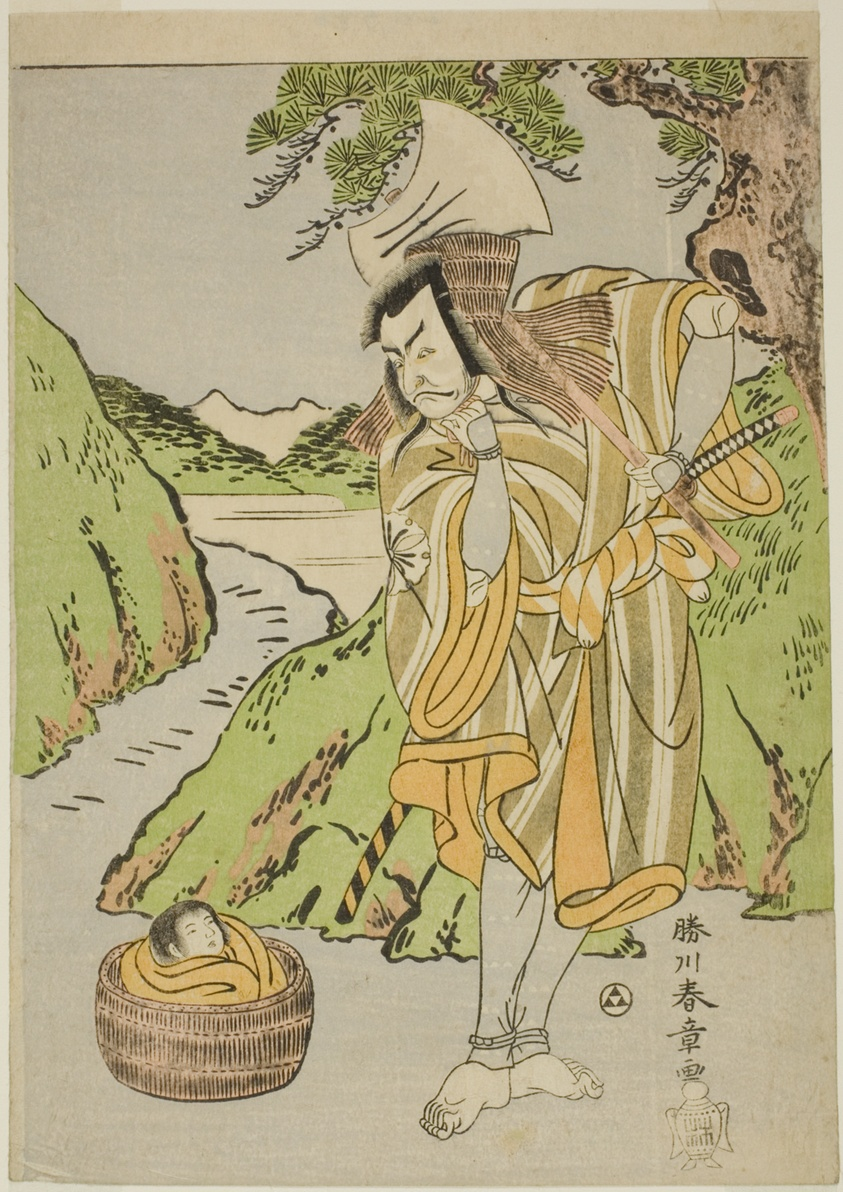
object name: Print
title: The Actor Matsumoto Koshiro II as Osada no Taro Kagemune Disguised as the Woodcutter Gankutsu no Gorozo, in Act Four (?) of the Play Nue no Mori Ichiyo no Mato (Forest of the Nue Monster: Target of the Eleventh Month), Performed at the Nakamura Theater from the First Day of the Eleventh Month, 1770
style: Japanese (culture or style)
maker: Katsukawa Shunsho 勝川 春章; Japanese, 1726-1792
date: c. 1770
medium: Color woodblock print; chuban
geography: Japan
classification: woodblock print; print; asian art